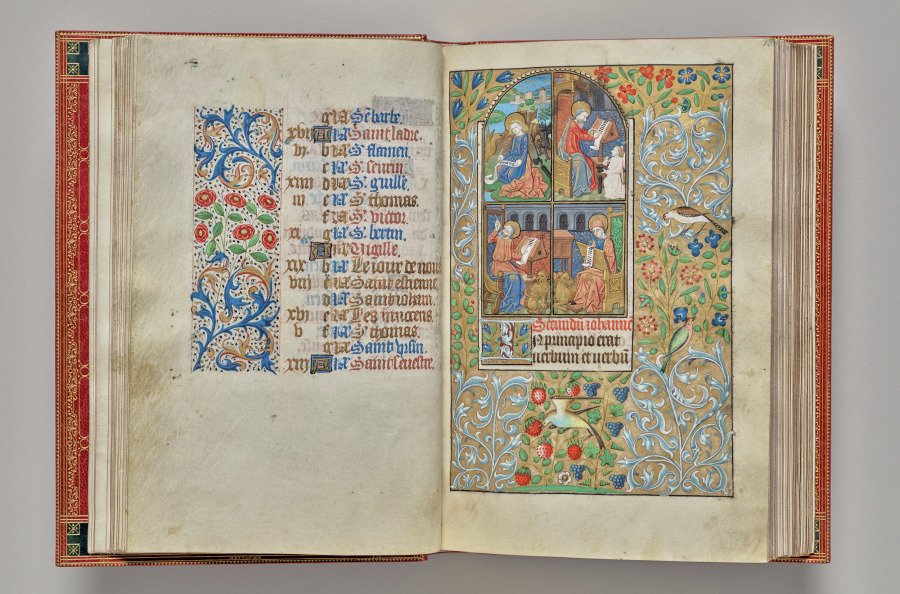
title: Book of Hours (Use of Rouen): fol. 12v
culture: France, Rouen, 15th century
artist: Master of the Geneva Latini (French, active Rouen, 1460–80)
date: c. 1470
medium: ink, tempera, and gold on vellum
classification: Bound Volume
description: In the late 1400s and early 1500s Rouen was an established and important center of book production. The city’s cathedral had a wealthy chapter that spent large sums of money to commission books and to maintain its extensive library. The stationers and booksellers would have likely been concentrated in or near the cathedral precinct. This artist, named after a manuscript now in Geneva, was Rouen’s principal illuminator during the second half of the 1400s.